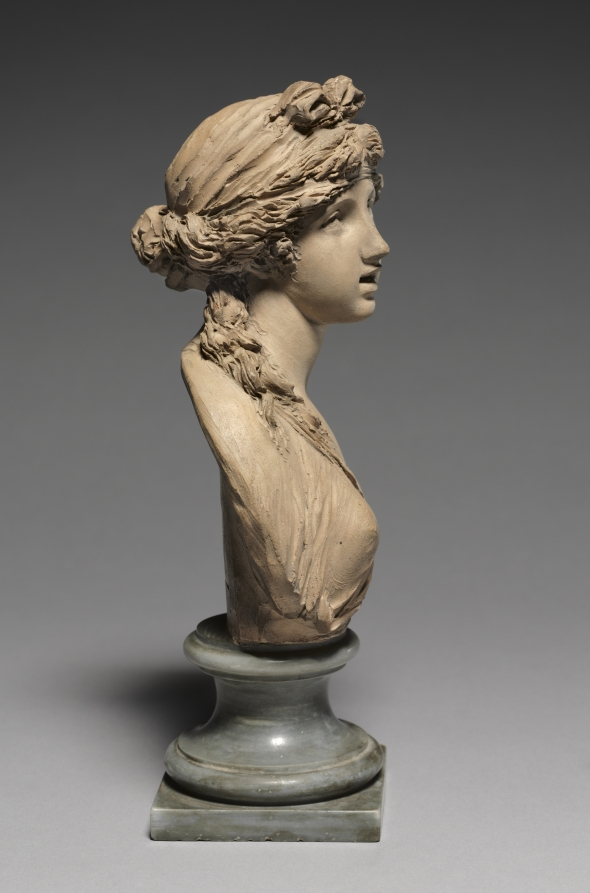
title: Bust of a Woman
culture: France, 19th century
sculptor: Joseph-Charles Marin (French, 1759–1834)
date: 1800–1834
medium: terracotta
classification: Sculpture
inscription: inscribed, back of sculpture below neck: Marin.